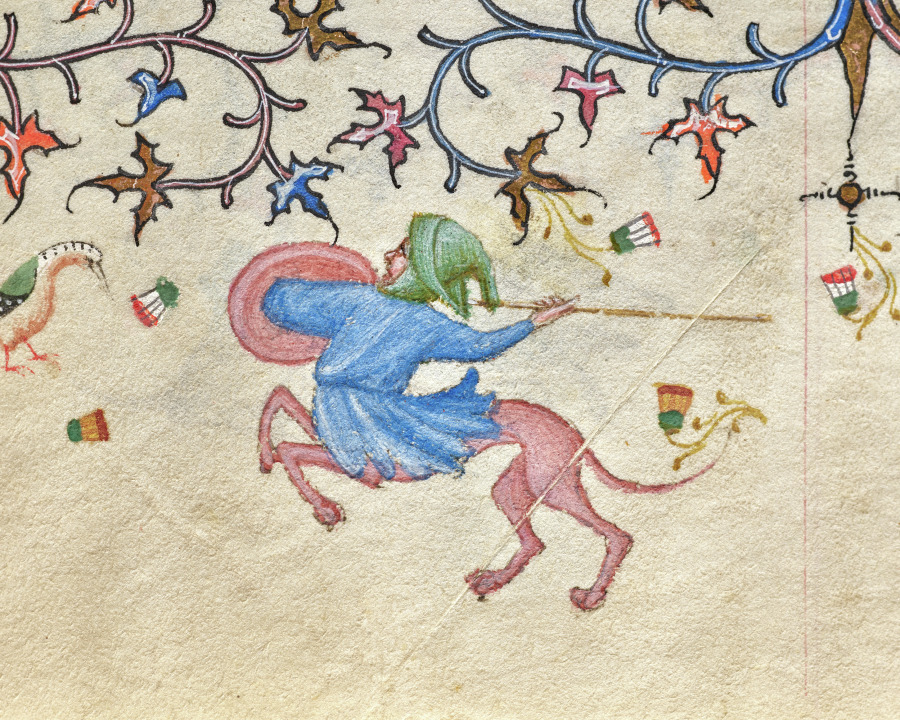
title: Hours of Charles the Noble, King of Navarre (1361-1425), fol. 315r, Text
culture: France, Paris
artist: Master of the Brussels Initials and Associates (French)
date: c. 1405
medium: ink, tempera, and gold on vellum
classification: Bound Volume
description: This precious volume was obviously highly prized by its owner, the French-born King of Navarre, who had his coat of arms painted on no less than twenty folios. Rather than directly commissioning this manuscript from a specific workshop, it seems that Charles the Noble acquired his book of hours -- perhaps ready-made for the luxury market -- while on a trip to Paris in 1404-05. A collaborative effort, six painting styles are evidenced within the pages of this codex, those of two Italians, two Frenchmen, and two Netherlanders. The painter who was responsible for the planning and decoration of the book, and who produced seventeen of the large miniatures, was a Bolognese artist known as the Master of the Brussels Initials. His principal assistant, responsible for most of the borders, was a Florentine who signed his name "Zecho" da Firenze on folio 208 verso.